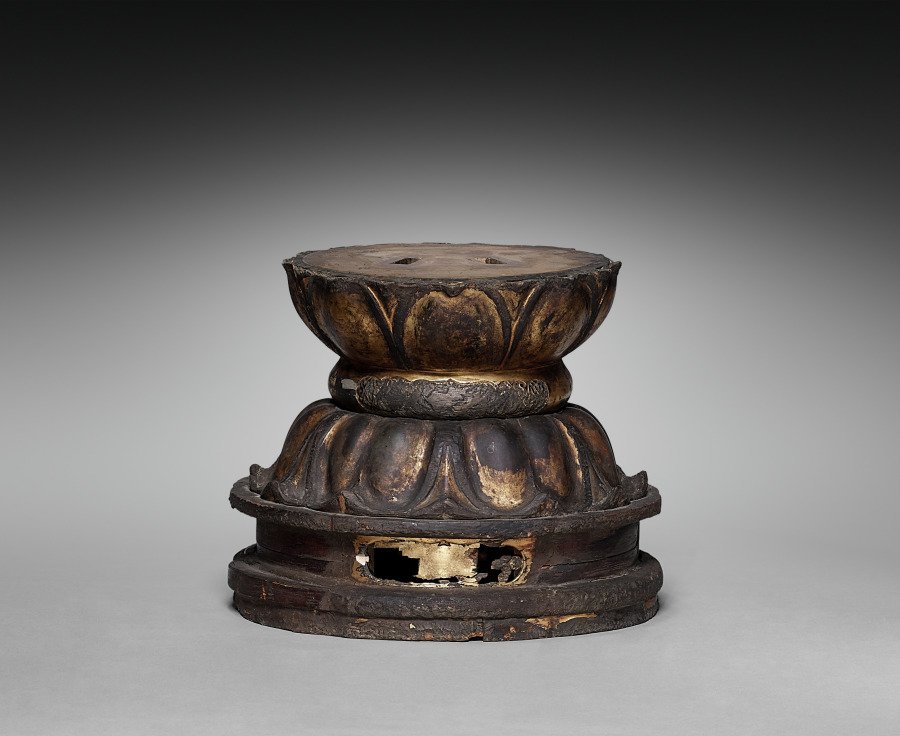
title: Amida (base)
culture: Japan, Kamakura period (1185–1333)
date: 1200s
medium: Wood with lacquer and gilding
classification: Sculpture